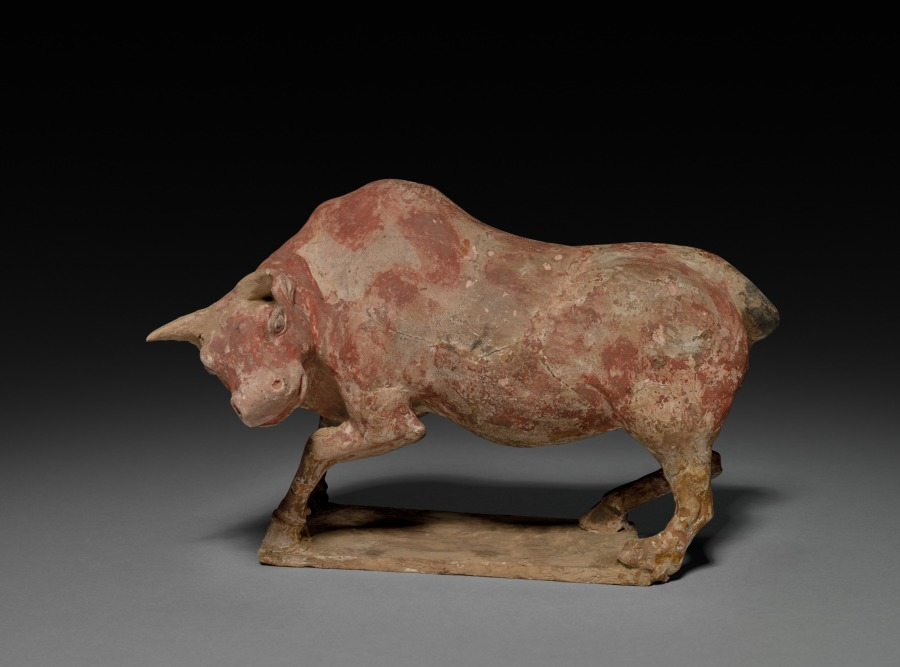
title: Bull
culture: China, Tang dynasty (618–907)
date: 618–907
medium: painted earthenware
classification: Ceramic